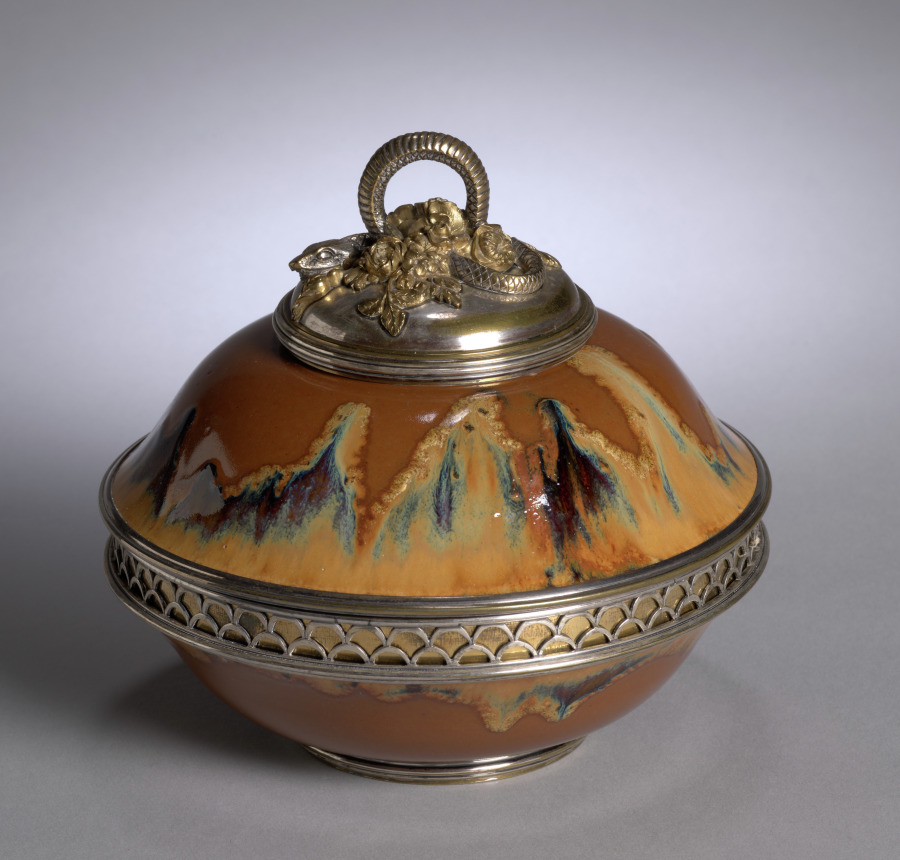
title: Covered Bowl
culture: France, late 19th-early 20th Century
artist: Auguste Delaherche (French, 1857–1940)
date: c. 1899–1900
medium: stoneware with metal mounts, silvered and gilded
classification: Ceramic